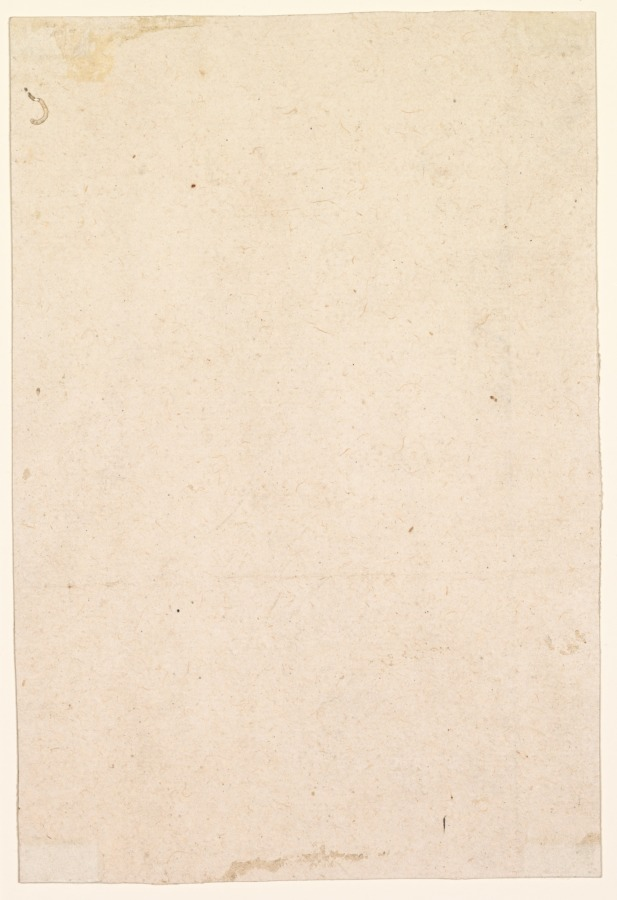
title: Layla and Majnun in the wilderness with animals, from a Khamsa (Quintet) of Amir Khusrau Dihlavi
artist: attributed to Sanwalah (Indian, active c. 1580–1600)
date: c. 1590–1600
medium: Gum tempera, ink, and gold on paper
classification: Painting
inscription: Calligraphy of Persian sayings from the aphoristic meditations of Khwaja Abd-Allah Ansari (Persian, 1006–1089) in top and bottom borders, in nasta‘liq script: What is “dervishness”? It is a little lump of fine purified soil with a sprinkling of a few drops of water: neither is the sole of the foot irritated by it, nor does the heel of the foot collect dust from it. The work of the lowly . . .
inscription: Persian inscription at top right, in nasta‘liq script: the meeting of Layla and Majnun, lover and beloved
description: Nestled in the multicolored rocks are the reunited lovers Layla and Majnun, forced by society to remain separated for years. Majnun’s name means “madman,” since the separation drove him past the brink of sanity. Exiling himself to the wilderness, he became emaciated. When Layla found him after a prophetic dream, the wild animals gathered around, drawn to the purity and depth of their love. This painting illustrates a version of the story as told by an Indian author who wrote in Persian. He altered the ending given by previous Persian authors to the ancient Bedouin tale that originated among nomadic tribes of the Arabian Peninsula, in which Layla dies before the couple can be physically reunited.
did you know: White paint, prone to flaking, chipped off her face, revealing the underdrawing.